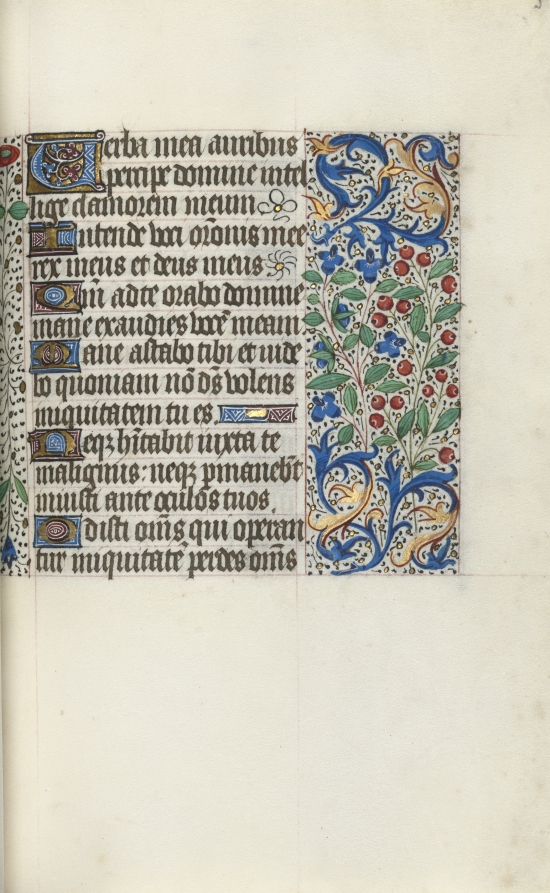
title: Book of Hours (Use of Rouen): fol. 59r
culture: France, Rouen, 15th century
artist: Master of the Geneva Latini (French, active Rouen, 1460–80)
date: c. 1470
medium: ink, tempera, and gold on vellum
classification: Bound Volume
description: In the late 1400s and early 1500s Rouen was an established and important center of book production. The city’s cathedral had a wealthy chapter that spent large sums of money to commission books and to maintain its extensive library. The stationers and booksellers would have likely been concentrated in or near the cathedral precinct. This artist, named after a manuscript now in Geneva, was Rouen’s principal illuminator during the second half of the 1400s.